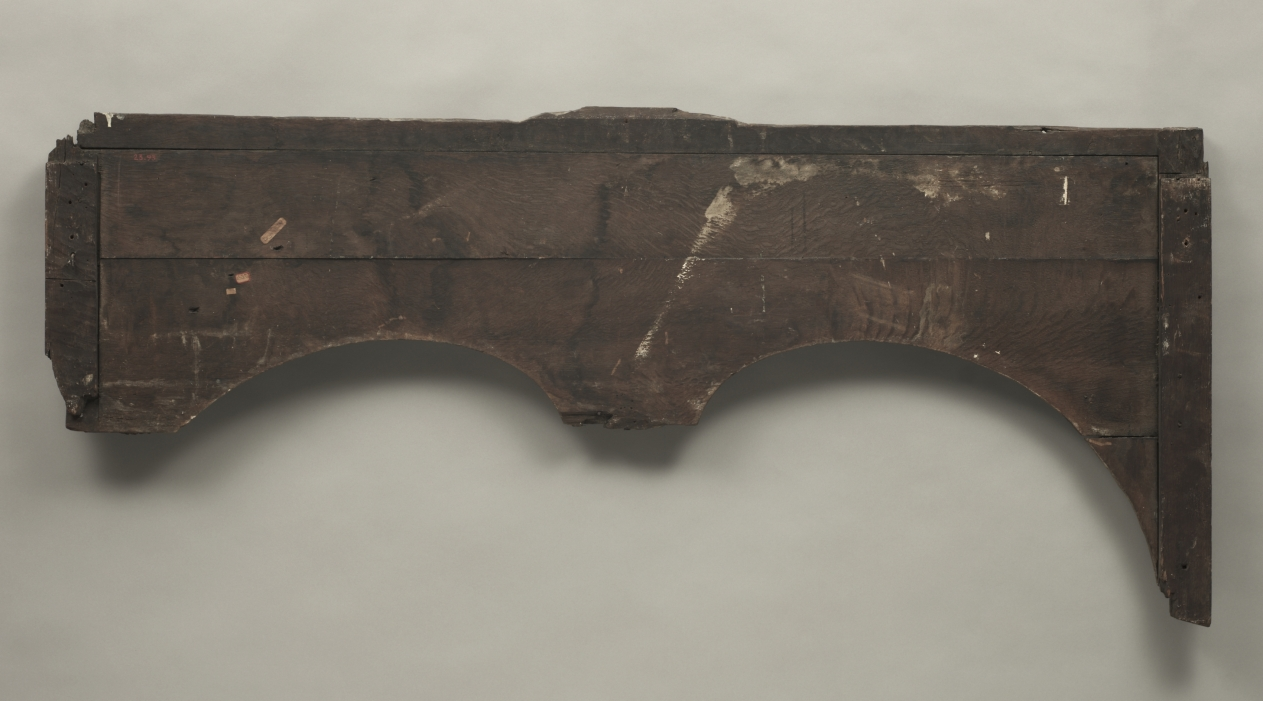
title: Panel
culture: France, Regency Period, 18th Century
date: 1715–1723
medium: wood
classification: Furniture and woodwork